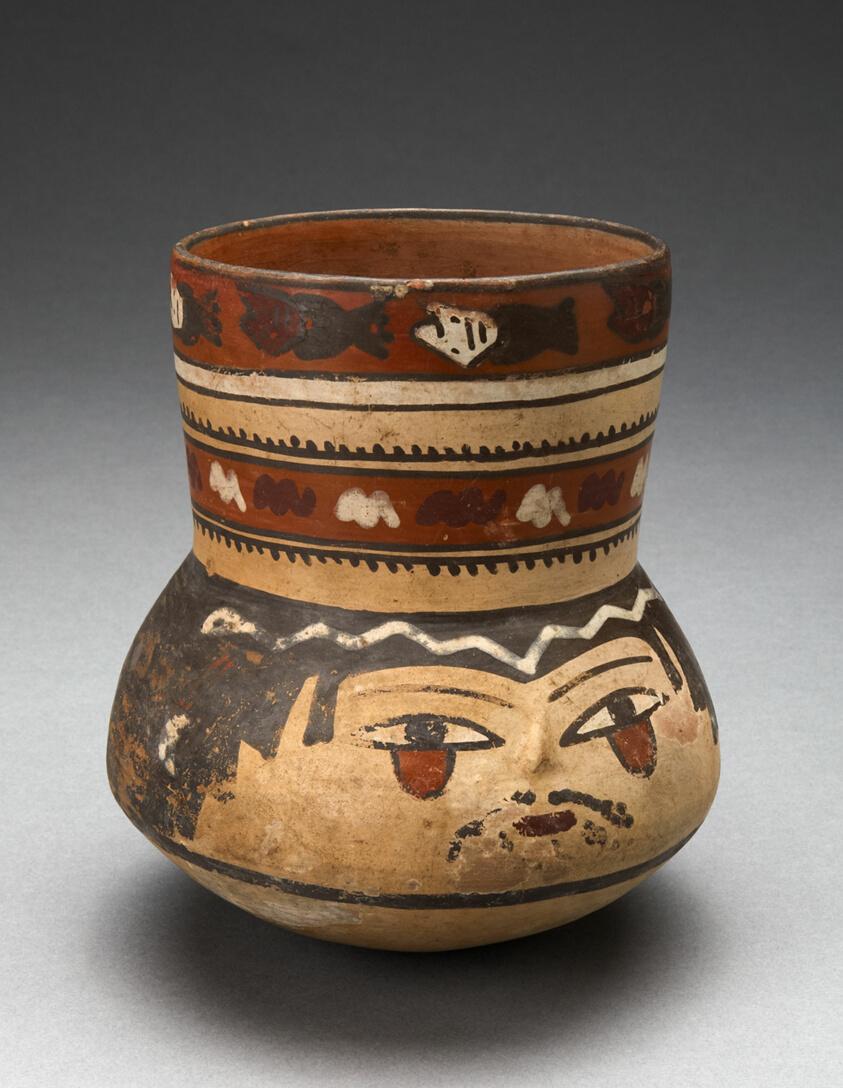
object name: Vessel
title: Beaker Depicting Human Head and Rows of Geometric Motifs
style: nazca, early intermediate period, Pre-Columbian, americas, Arts of the Americas, andean, andes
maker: Nazca; South coast, Peru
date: 180 BCE–500 CE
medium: Ceramic and pigment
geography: Nazca Valley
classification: earthenware; art of the americas; ceramics; vessel